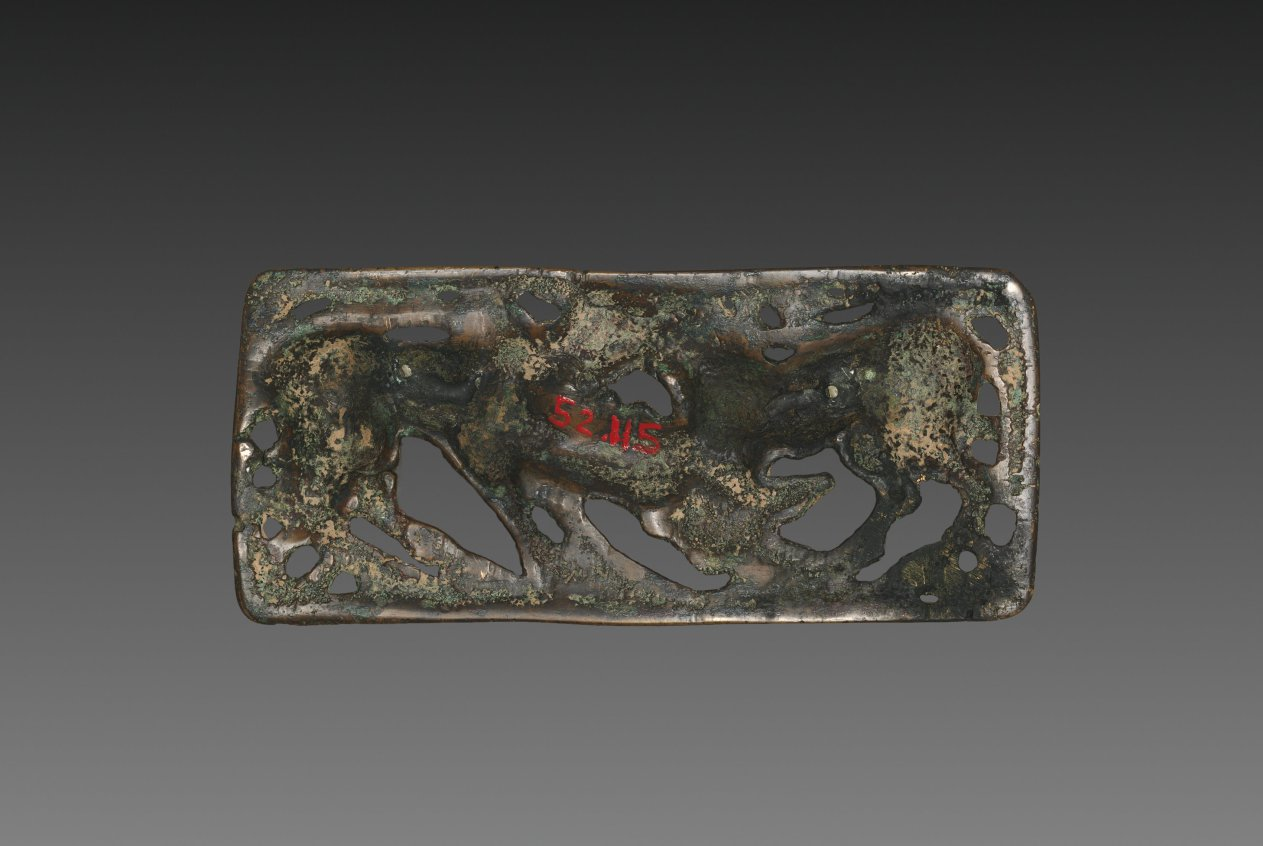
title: Belt Buckle with Animals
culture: China, Ordos region, Western Han dynasty (206 BCE–8 CE)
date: 202 BCE–9 CE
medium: gilt bronze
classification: Metalwork